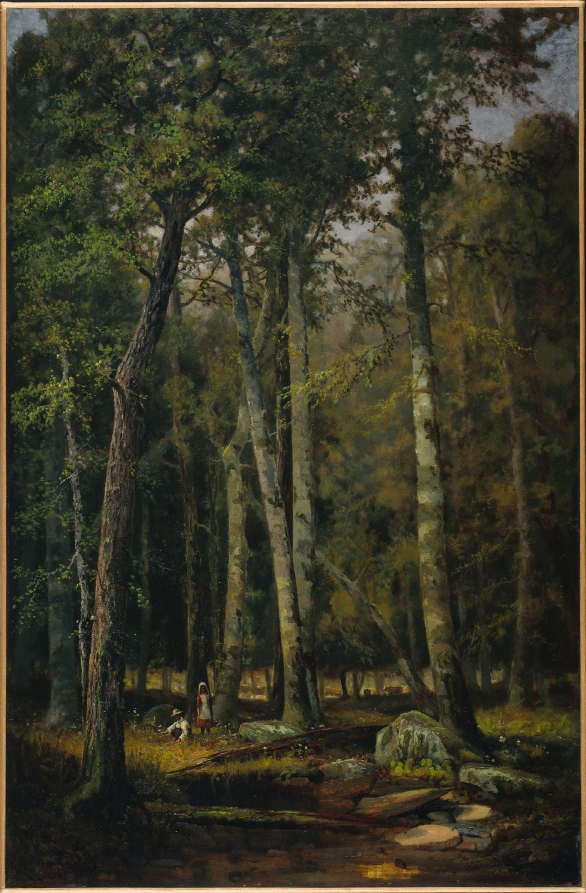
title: A Summer Afternoon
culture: America, Ohio, Cleveland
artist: R. Way Smith (American, 1840–1900)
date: 1882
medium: oil on canvas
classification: Painting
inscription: signed lower right: R. Way Smith 82; signed on back of canvas: A Summer Afternoon R. Way Smith 81.